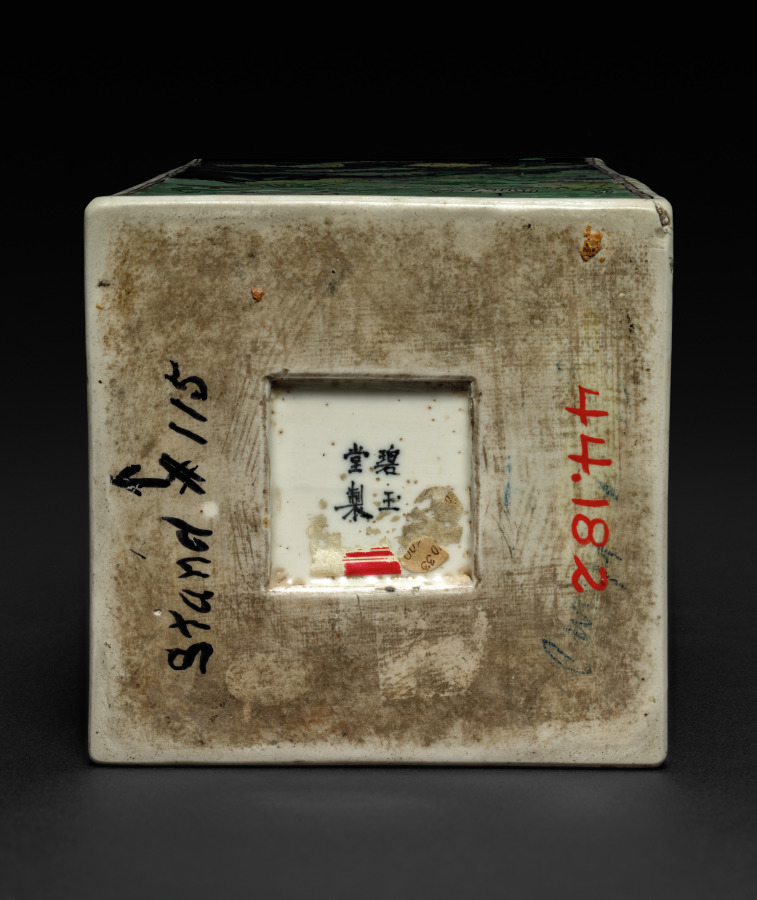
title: Club-shaped Vase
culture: China, Qing dynasty (1644-1911), Kangxi reign (1662-1722)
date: 1662–1722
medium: porcelain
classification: Ceramic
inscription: 碧玉堂製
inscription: [arrow] / Stand #115